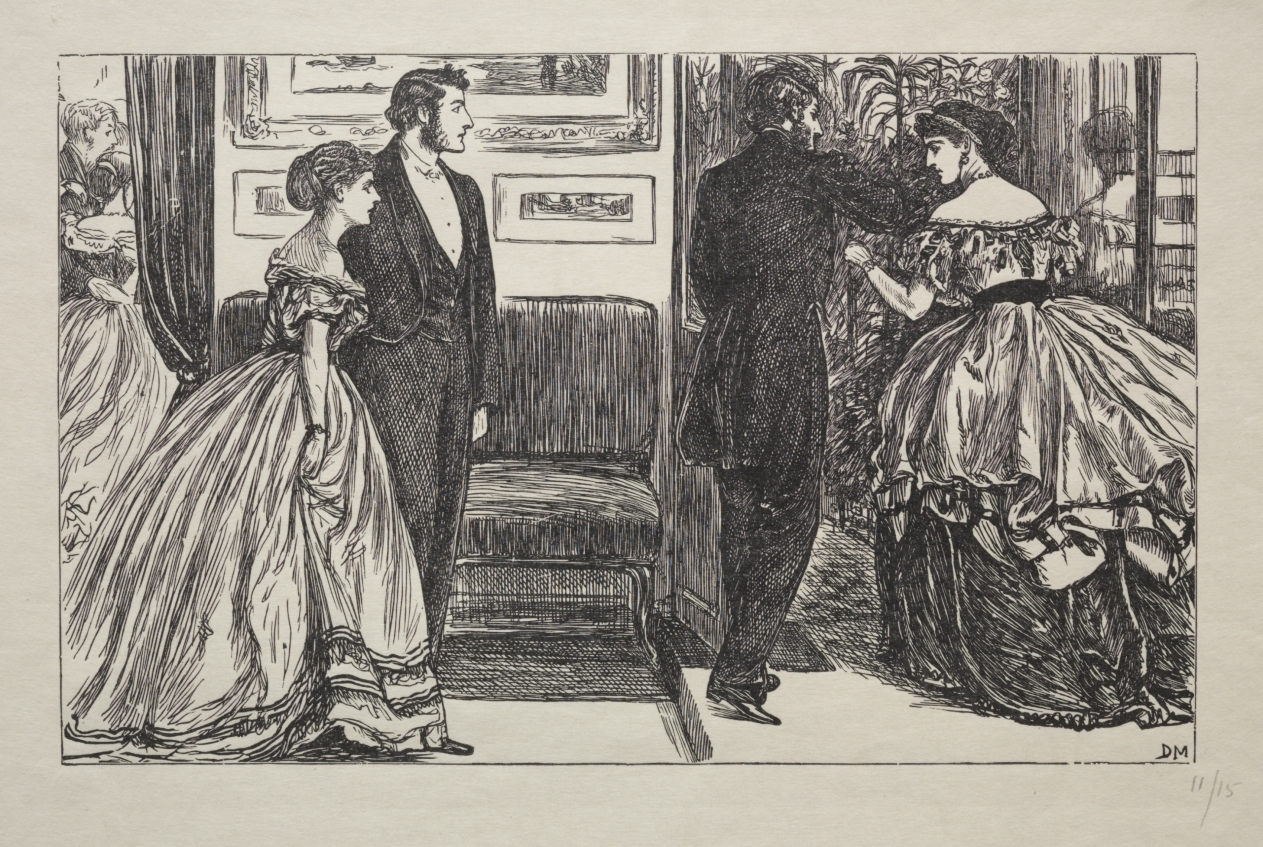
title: The Queen of Diamonds - How She Was Won and Lost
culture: England, 19th century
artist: George Louis Palmella Busson Du Maurier (British, 1834–1896)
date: 1866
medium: wood engraving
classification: Print